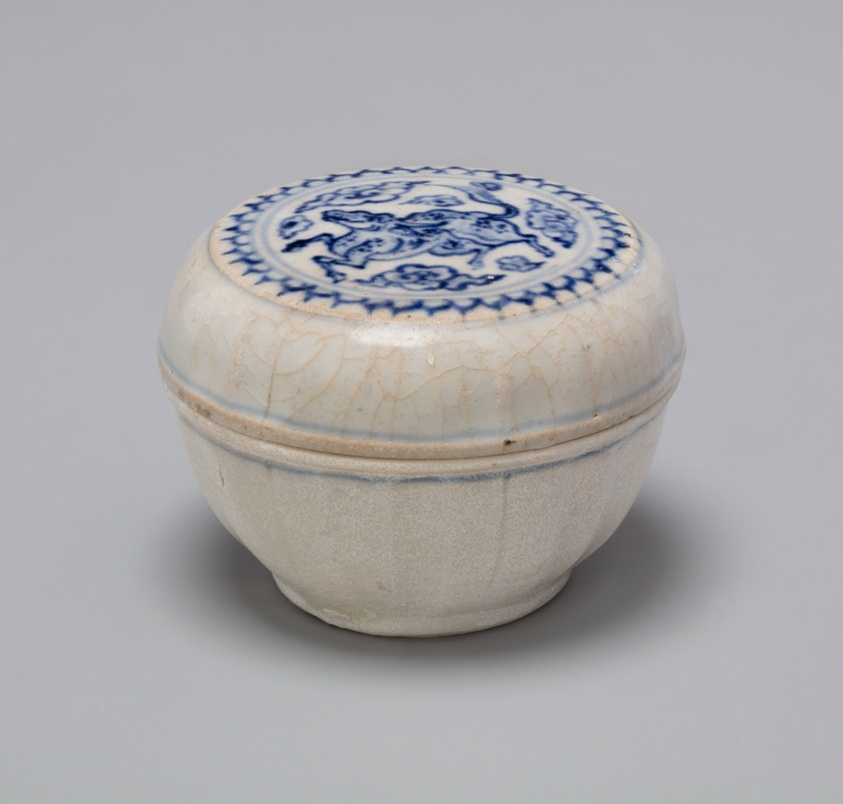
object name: Vessel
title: Miniature Covered Box with Animal and Cloud Motif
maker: Vietnam, near Hoi An, Offshore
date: 15th century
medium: Glazed stoneware with cobalt-blue underglaze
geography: Vietnam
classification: miniature; vessel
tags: blue (color)